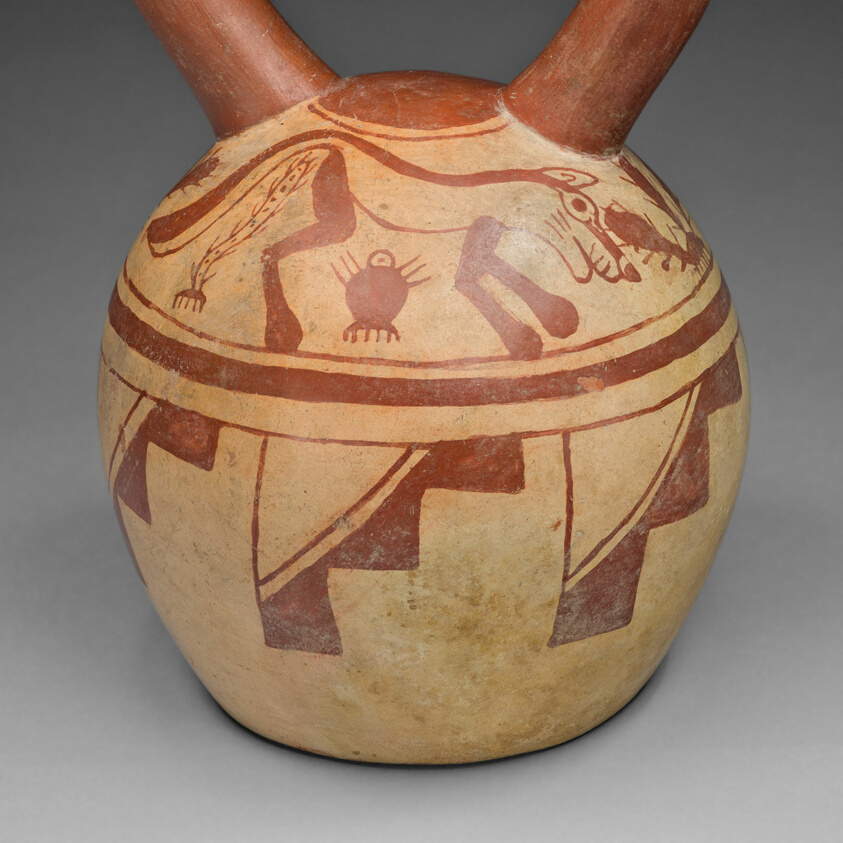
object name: Vessel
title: Stirrup Spout Vessel with Cat and Cactus Motifs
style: moche, Arts of the Americas, andes, south american, andean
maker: Moche (North coast, Peru)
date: 100 BCE–500 CE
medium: Ceramic and pigment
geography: Peruvian North Coast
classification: earthenware; ceramics; vessel; art of the americas